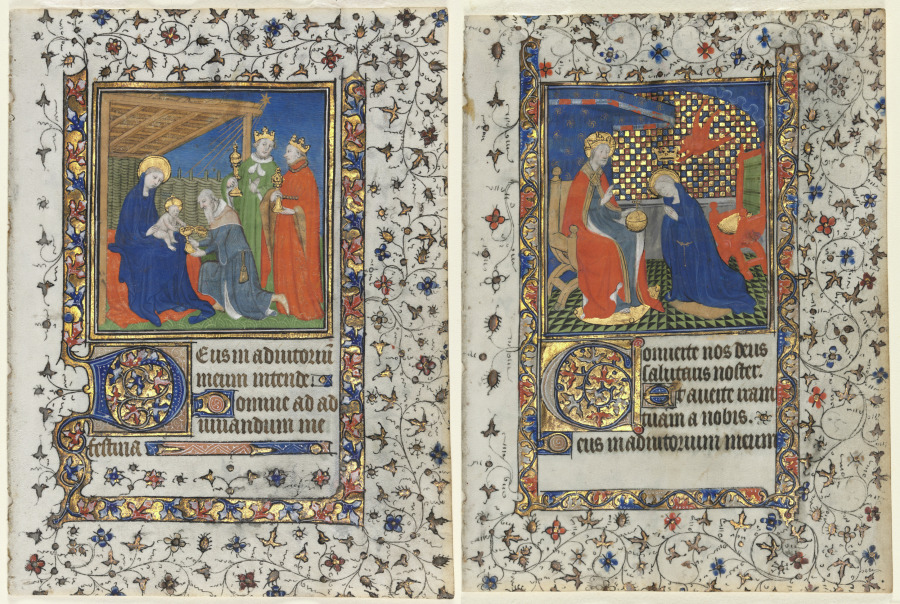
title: Pair of Bifolio from a Book of Hours: Adoration of the Magi and Coronation of the Virgin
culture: France, Paris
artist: workshop of Boucicaut Master (French, Paris, active about 1410–25)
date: c. 1415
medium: ink, tempera, and gold on vellum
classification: Manuscript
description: Books of hours were devotional books popular in the Middle Ages. Meant for laypeople, or those not in the clergy they were used at home and contained daily prayers as well as prayers for specific occasions, such as death, plague, warfare, travel, or bad weather. The heart of every book of hours is the Hours of the Virgin. With this set of prayers, the reader asked the Virgin Mary to intercede on their behalf. The Adoration of the Magi opens sext, the sixth hour of the day or noon. The Coronation of the Virgin begins compline, which is before retiring.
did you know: All books of hours contain the same basic sections and were highly customizable.